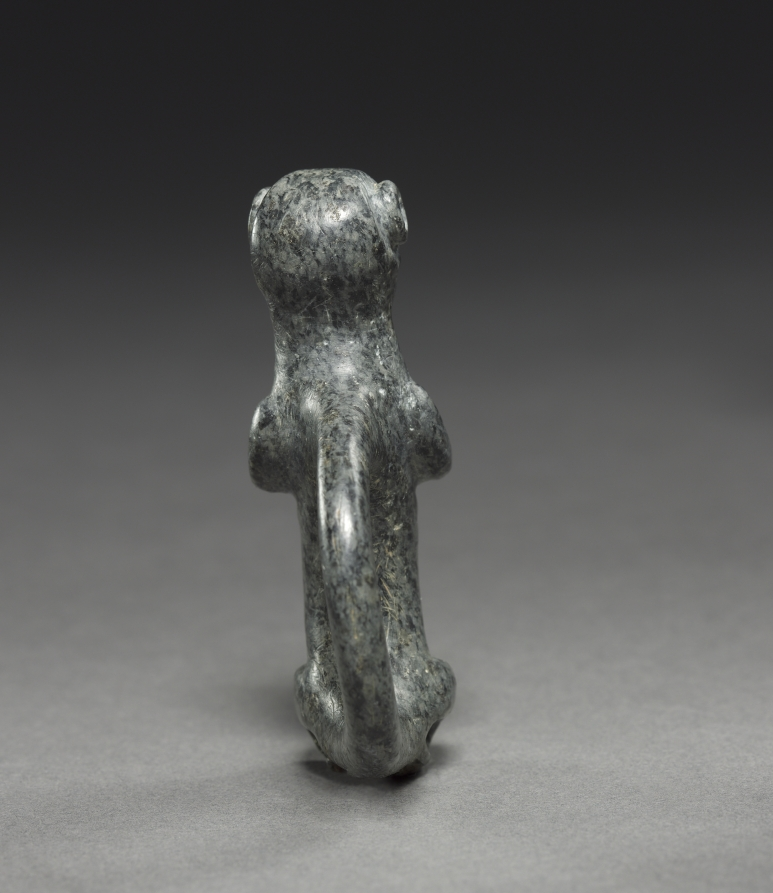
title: Monkey Pendant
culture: Panama, International Style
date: c. 400–900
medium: stone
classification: Sculpture